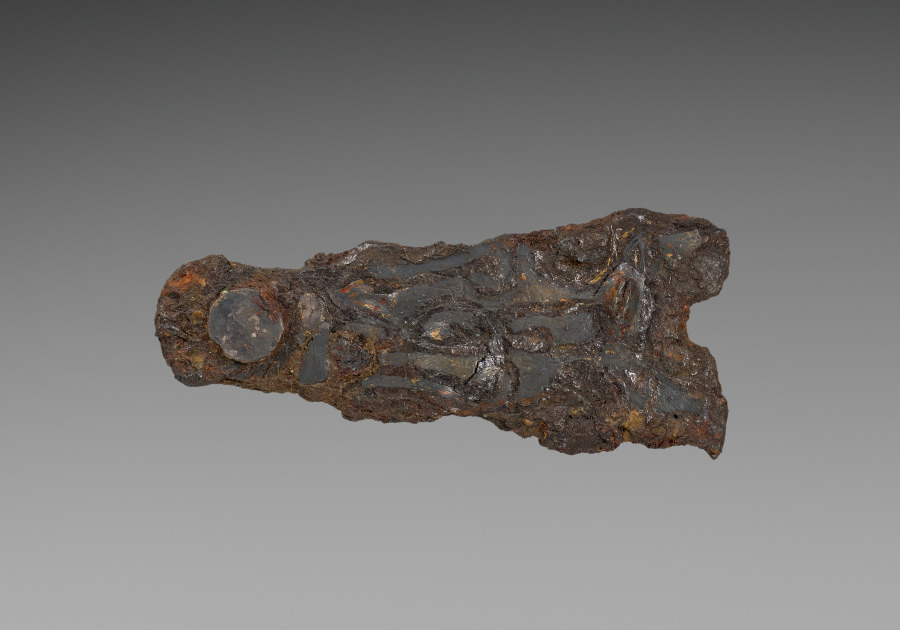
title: Buckle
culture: Merovingian, Burgundian, Migration period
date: 600s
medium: iron with gold and silver overlay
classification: Jewelry